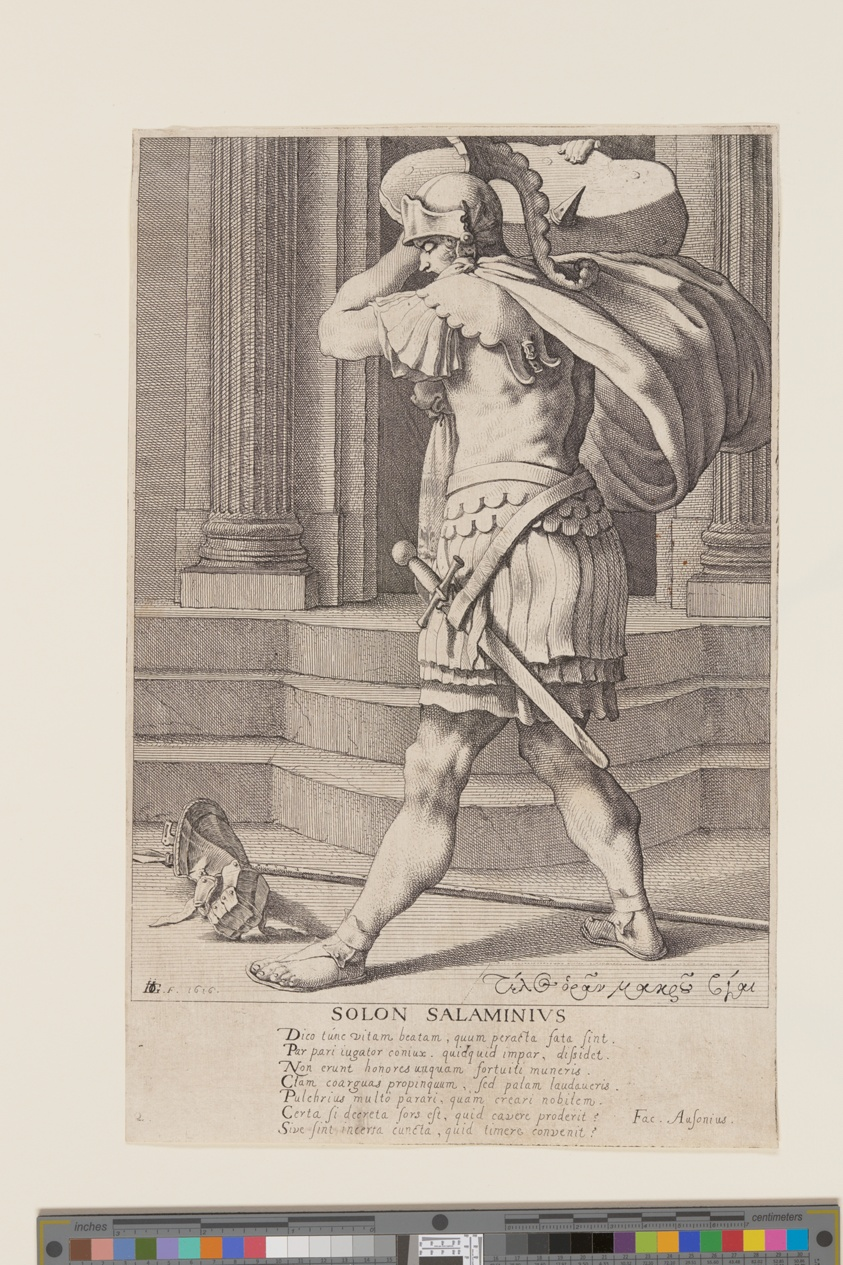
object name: Print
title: Solon Salaminius, from Seven Wise Men of Greece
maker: Jacques de Gheyn III; Dutch, c. 1596-1641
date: 1616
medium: Etching on ivory laid paper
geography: Netherlands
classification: etching; paper; print; prints and drawing